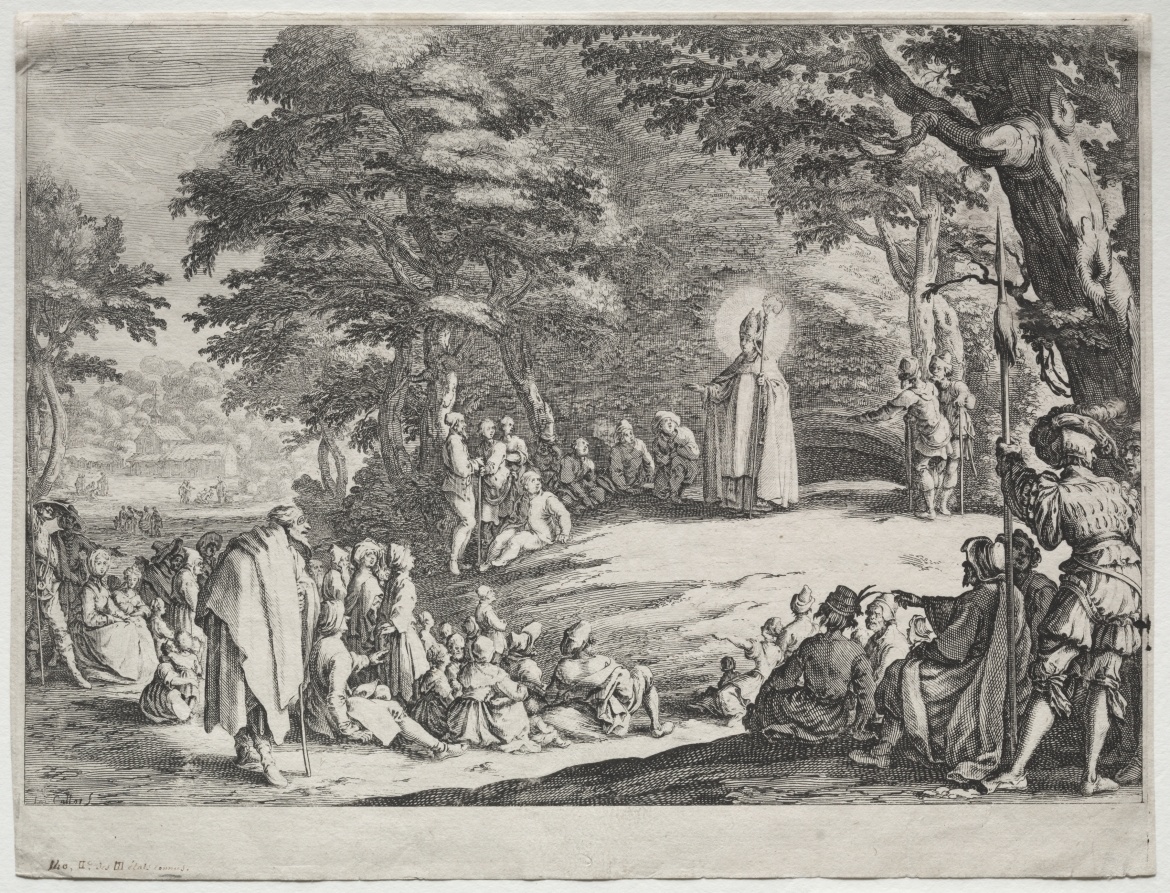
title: St. Amo Preaching in a Wood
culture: France, 17th century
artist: Jacques Callot (French, 1592–1635)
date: ca. 1621–27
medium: etching and engraving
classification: Print